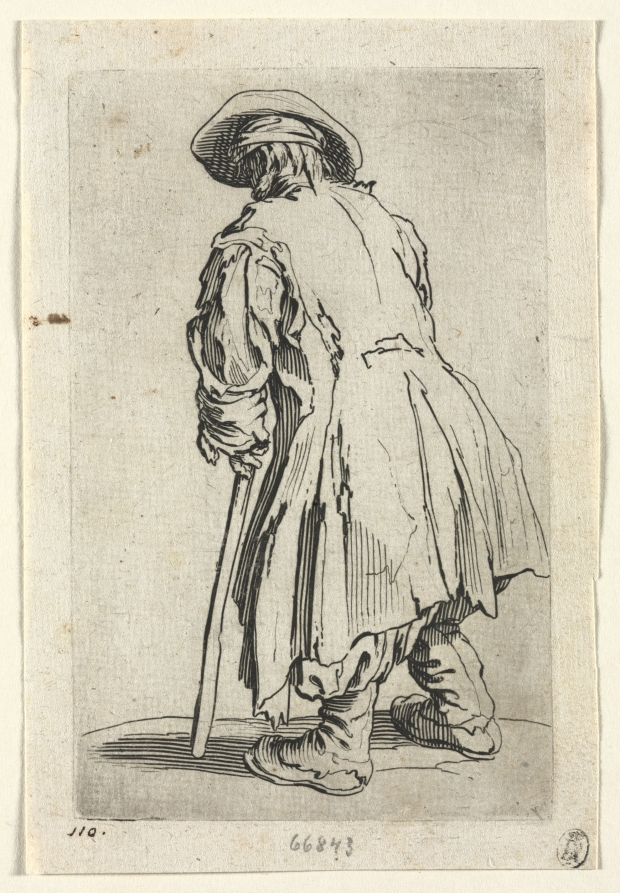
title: The Beggars: Old Beggar on One Single Crutch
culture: France, 17th century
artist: Jacques Callot (French, 1592–1635)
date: c. 1623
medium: etching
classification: Print